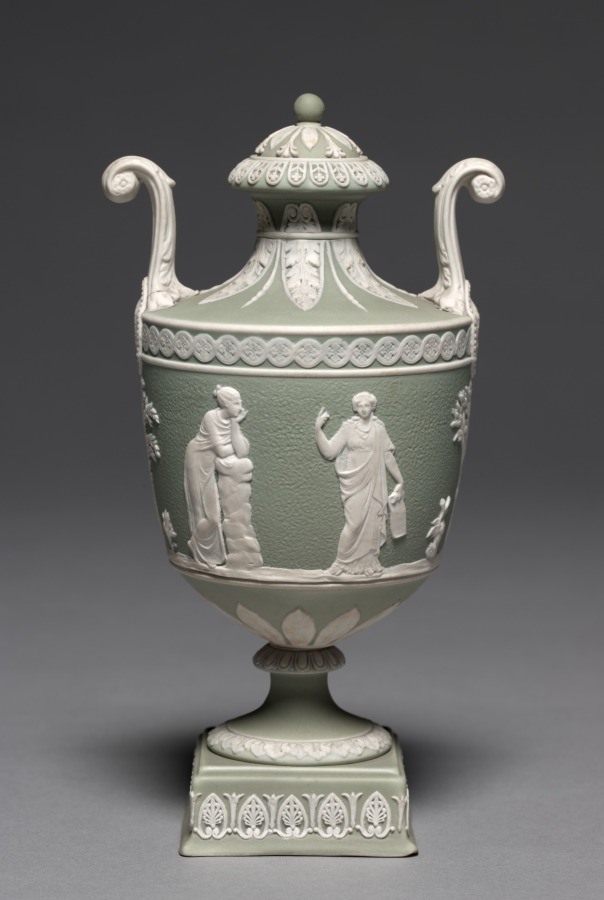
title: Covered Urn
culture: England, Staffordshire, late 18th-early 19th Century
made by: Wedgwood Factory (British)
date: c. 1800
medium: jasper ware with relief decoration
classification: Ceramic